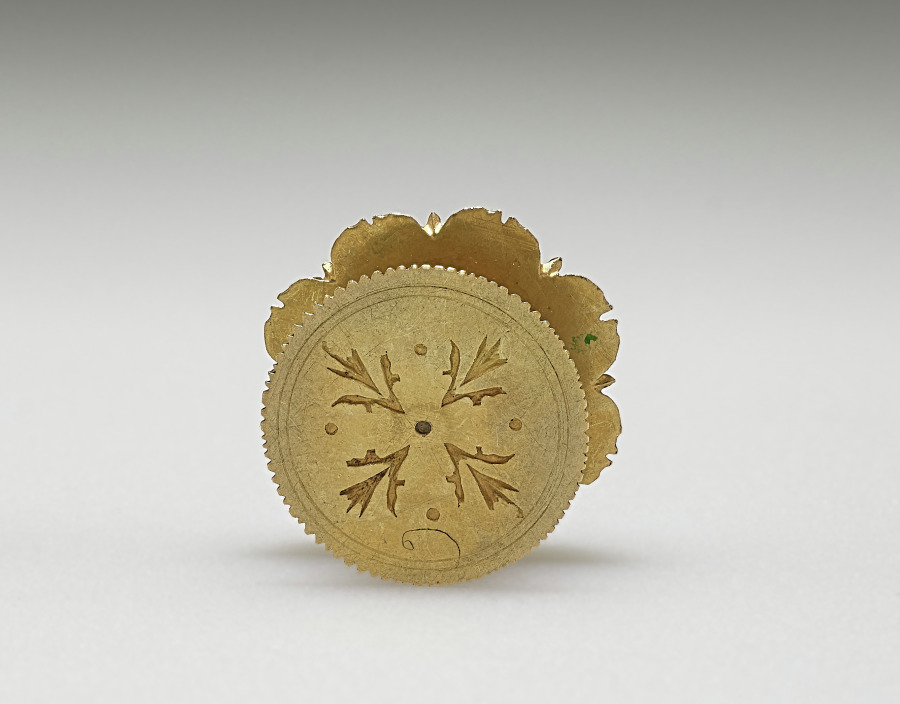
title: Earring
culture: Burma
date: 1800s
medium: gold and rubies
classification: Jewelry